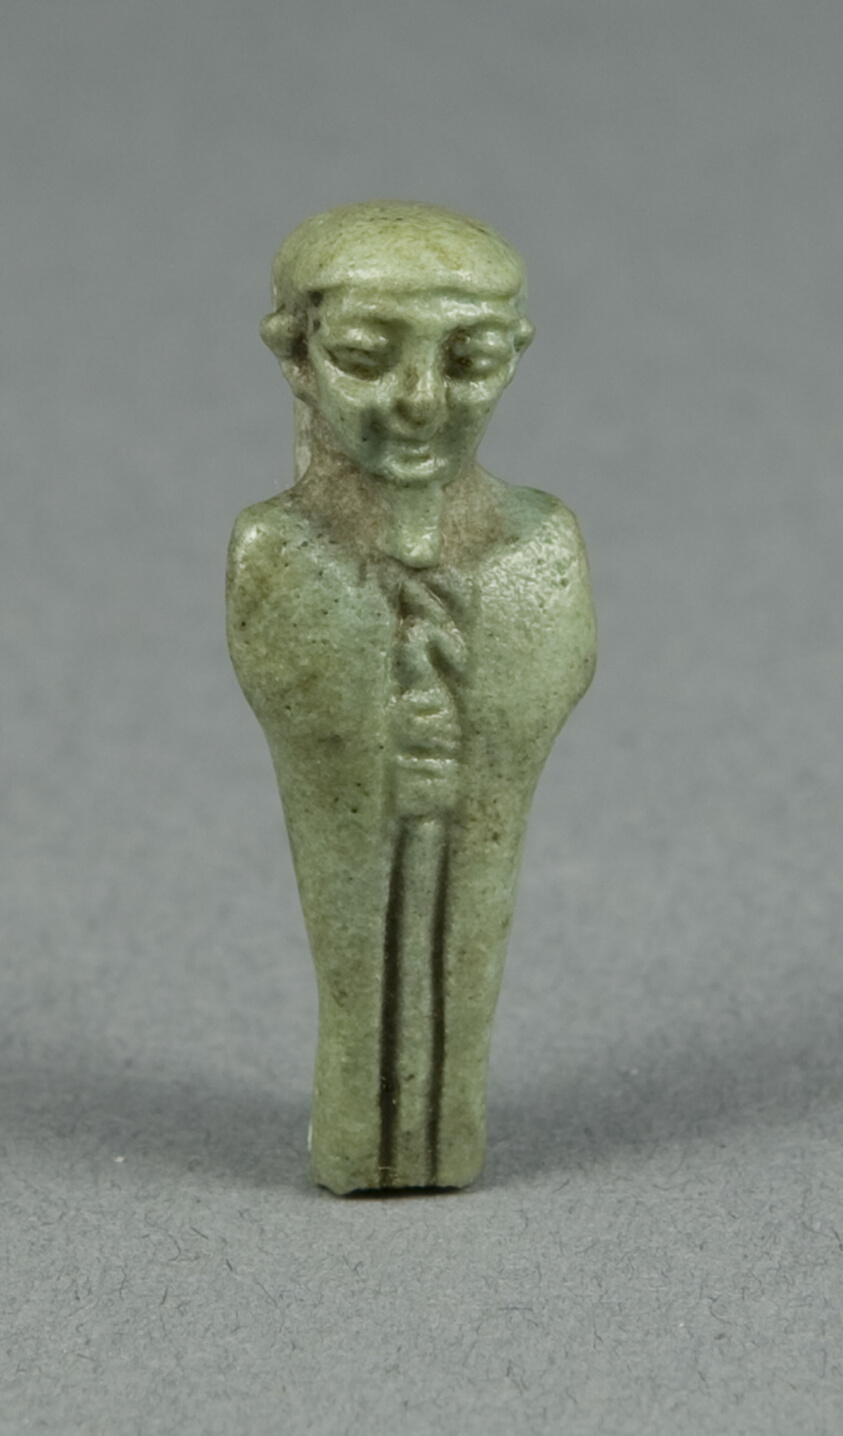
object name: Costume and Accessories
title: Amulet of the God Ptah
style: egyptian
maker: Egyptian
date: Late Period, Dynasty 26–31 (664–332 BCE)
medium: Faience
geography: Egypt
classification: amulet; jewelry; ceramics; ancient art; costume; faïence (composite material)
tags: gods (deities)